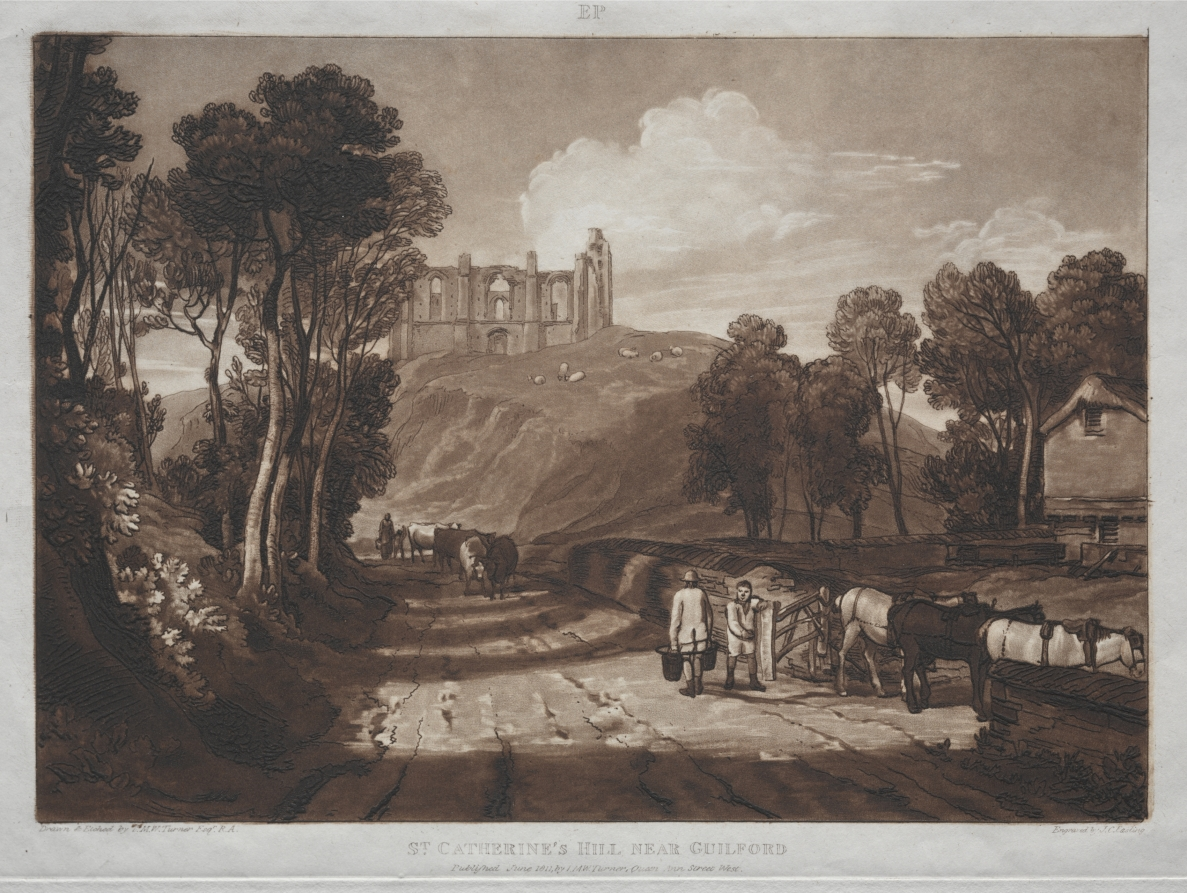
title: Liber Studiorum: St. Catherine's Hill, near Guilford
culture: England, 19th century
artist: Joseph Mallord William Turner (British, 1775–1851)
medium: etching and mezzotint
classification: Print